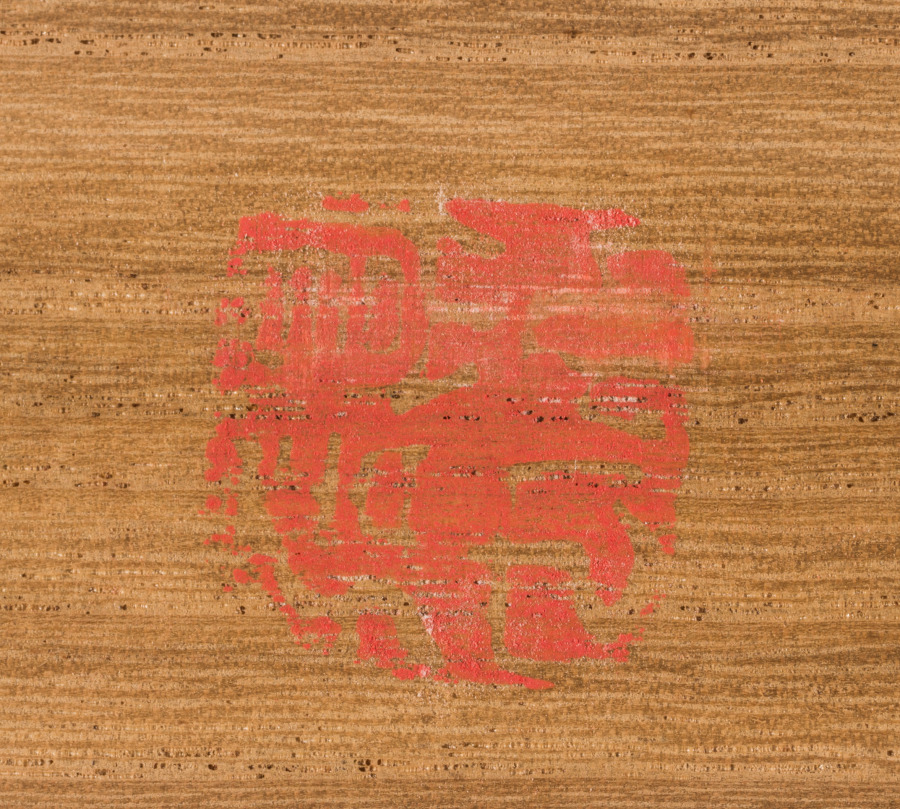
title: Lake Suwa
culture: Japan, Edo period (1615–1868)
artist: Utagawa Hiroshige (Japanese, 1797–1858)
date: c. 1832–58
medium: hanging scroll; ink and color on silk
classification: Painting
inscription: 立斎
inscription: 廣重